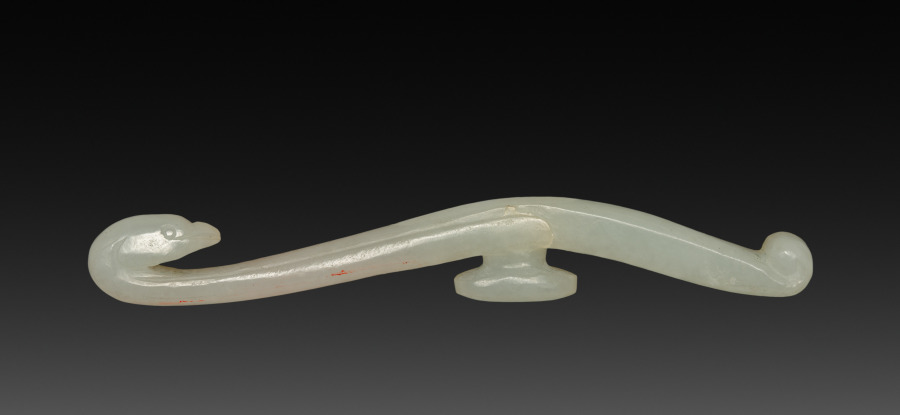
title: Buckle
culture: China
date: 1900s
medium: jade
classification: Jewelry